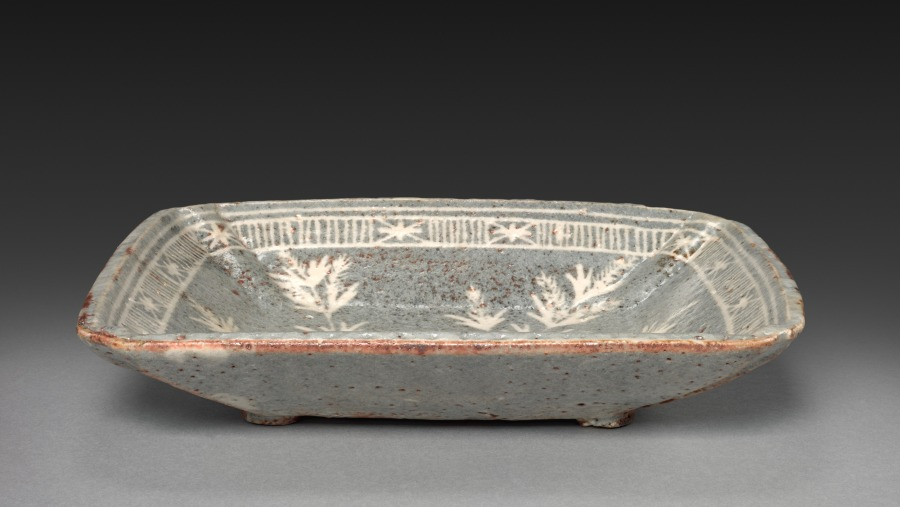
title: Dish with Autumn Grasses and Rocks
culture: Japan, Momoyama period (1573-1615) to Edo period (1615-1858)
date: late 1500s–early 1600s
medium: Stoneware with underglaze iron oxide slip and incised designs (Mino ware, Shino type)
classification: Ceramic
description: Mino ware is stoneware produced in the Mino area of present-day Gifu prefecture in central Japan. Works like this piece are called nezumi-shino, or “mouse-gray” Shino, after the glazing technique. The gray color and white design of grasses were achieved by applying an iron oxide slip to the surface and carving through it to the white clay, and then covering the whole surface in glaze and firing the object. In its design, this serving dish emulates Chinese ceramic prototypes, but its shape recalls wooden and lacquered trays commonly used in Japan at the time.